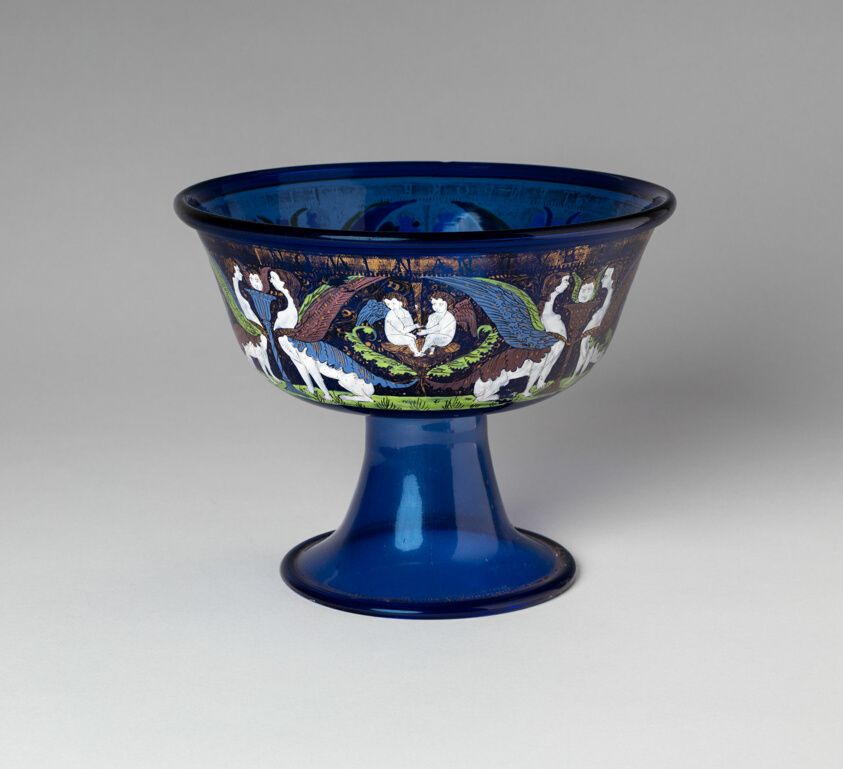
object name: Glass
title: Footed Bowl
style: early renaissance, 15th century, Classical, Renaissance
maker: Italian; Venice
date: c. 1490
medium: Blue glass, enamel, and gilding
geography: Venice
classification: bowl; enamel; glass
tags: sphinxes, ancient Rome, cherubs, classical